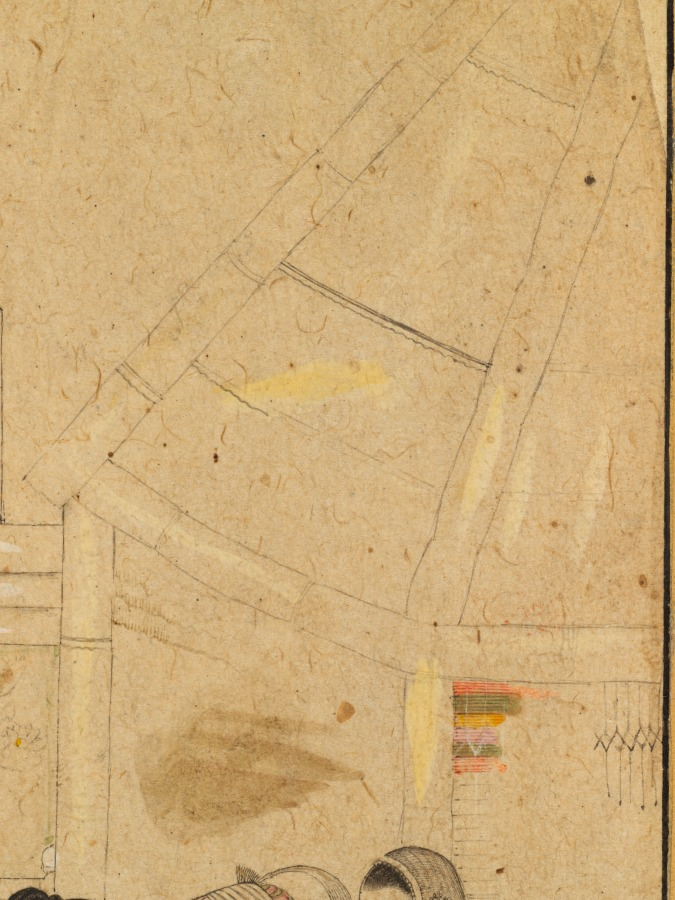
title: Women playing at cross-dressing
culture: India, Golconda, Deccan, 17th century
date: c. 1680–1700; border added 1800s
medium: ink heightened with colors on paper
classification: Painting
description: In this scene harem women act out the visit of a prince. One of them has donned a man’s royal feathered turban, and a lady affectionately offers a cup of wine as attendants stand by with two more bottles, a fan, and a rose. The master artist of an Indian painting workshop would draw the composition and make visual notations as to which colors and patterns should be used. The drawing would then be given to a colorist to paint, with final details rendered by another artist or the initial master.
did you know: Heavy eyelids give a languorous quality to paintings made in Golconda.